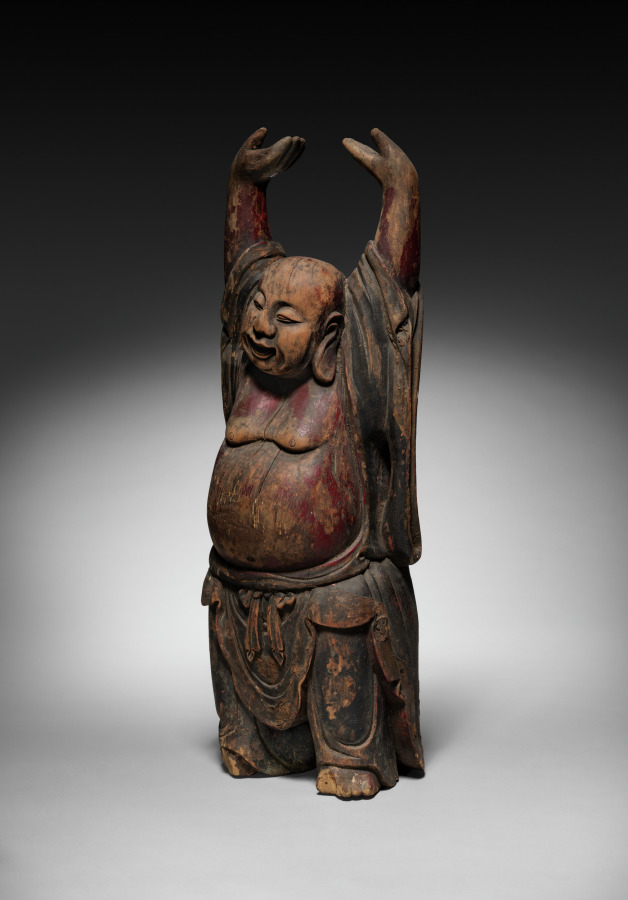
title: The Monk Budai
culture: China, Ming dynasty (1368–1644)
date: 1400s–1500s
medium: wood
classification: Sculpture